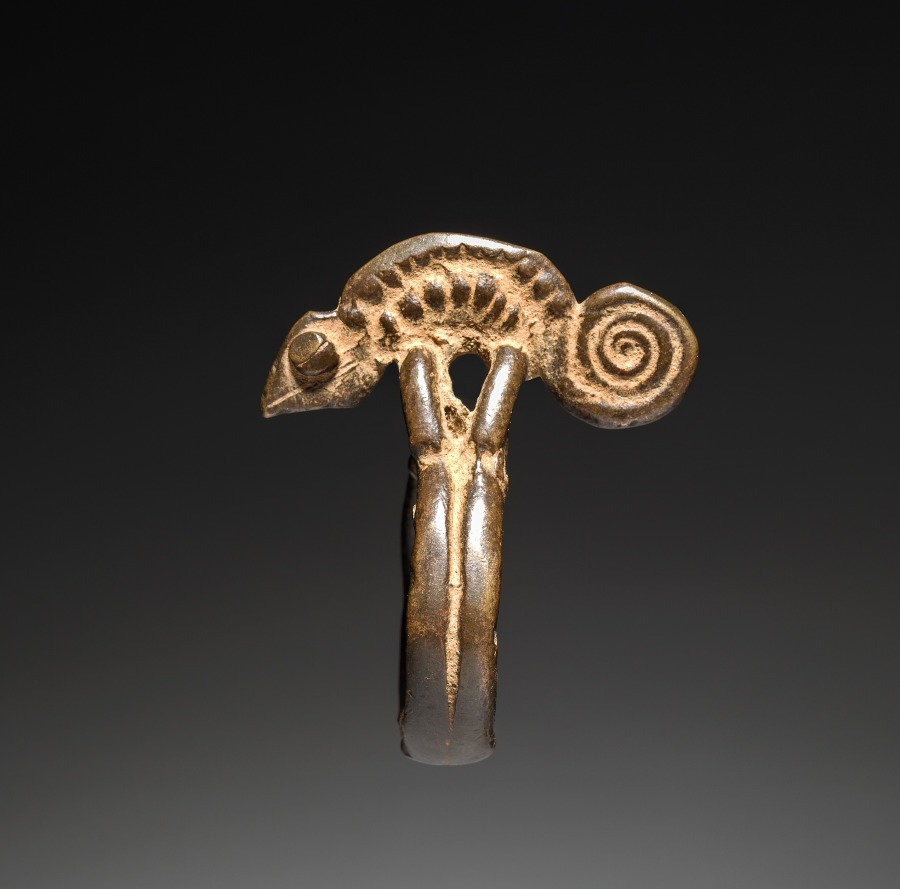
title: Ring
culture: Africa, West Africa, Côte d'Ivoire, Senufo style, unknown maker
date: before 1975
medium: Copper alloy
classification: Jewelry